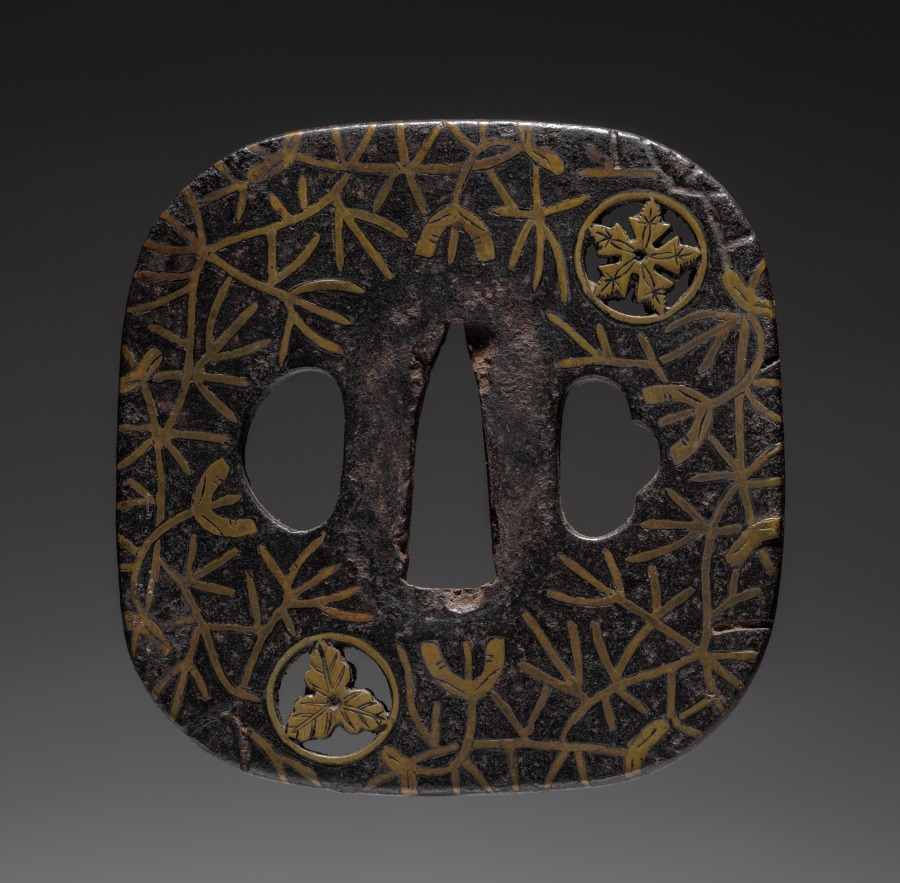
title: Sword Guard (Tsuba)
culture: Japan, possibly Edo period (1615-1868)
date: c. 1615–1868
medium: iron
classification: Arms and Armor